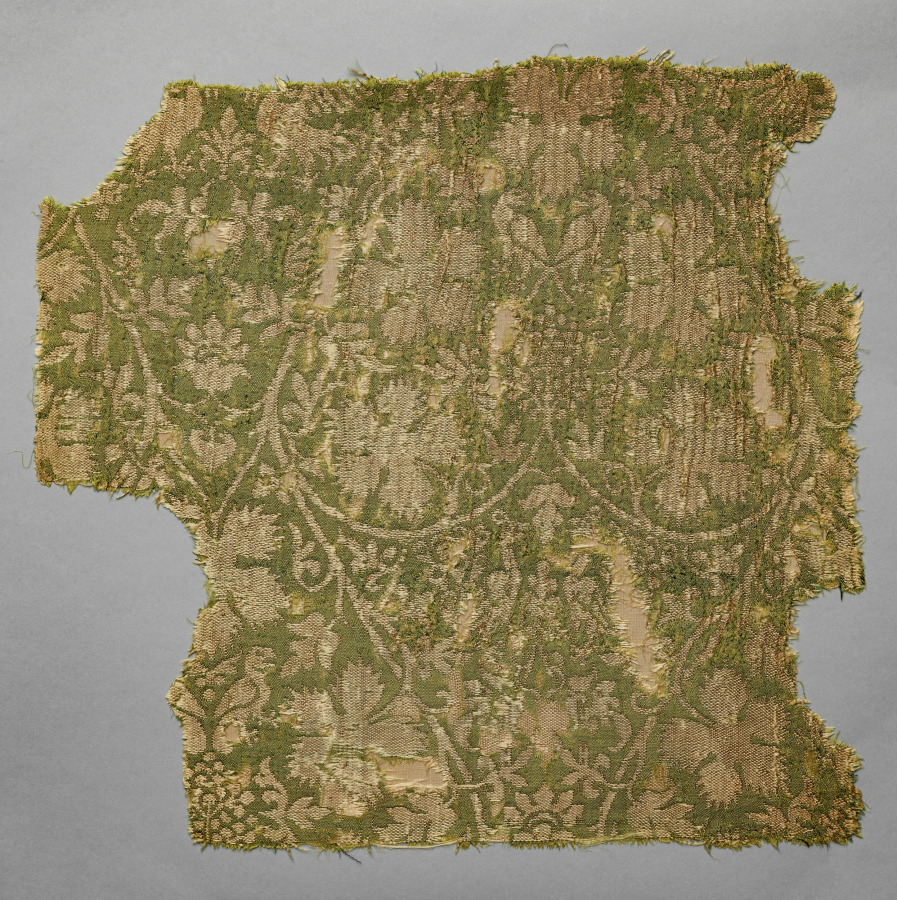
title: Silk fragment with scrolling vines, grape leaves, grapes, and birds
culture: Italy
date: 1325–50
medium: Silk: lampas weave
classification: Textile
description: This silk fragment displays a revolutionary new fashion in Italian textile design, influenced by the exotic patterns in silks imported from China, Byzantium, and Islamic countries of the Middle East. Beginning in the 1320s, instead of the static arrangement of motifs stacked one above the other, Italian designers staggered the motifs, creating asymmetry and movement. Even this fragment suggests motion through the arrangement of motifs in a curved lattice layout. However, the actual motifs—the grape leaves and bunches of grapes—remain typically Italian.